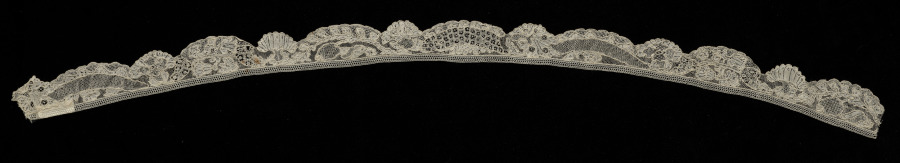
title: Lace Edging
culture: Italy(?), Burano(?)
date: 1700–1740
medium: Needle lace (Burano Point)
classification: Lace